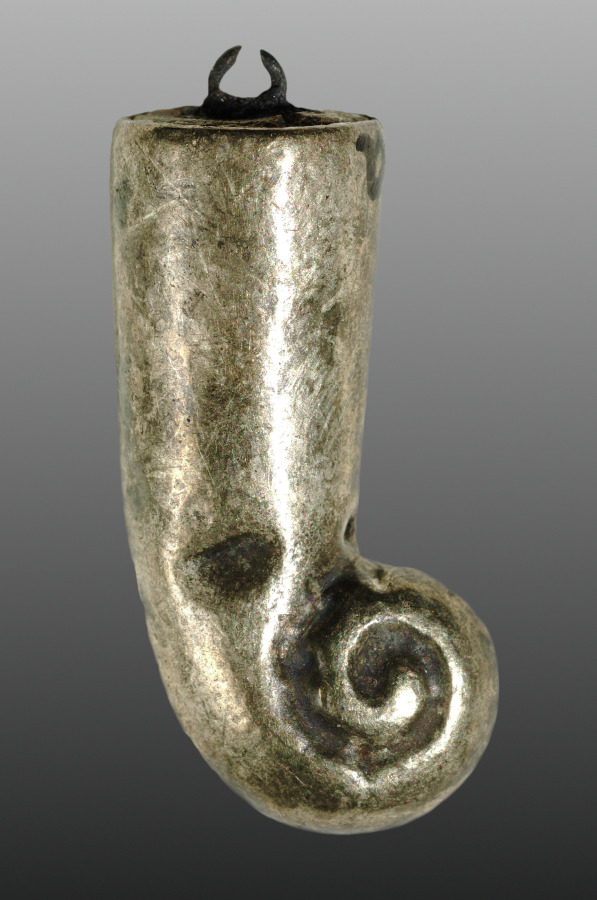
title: Sidelock (one of a pair)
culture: Egypt, Middle Kingdom (2040–1648 BCE), Dynasty 12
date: 1980–1801 BCE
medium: Electrum (?) over a calcite gesso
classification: Jewelry